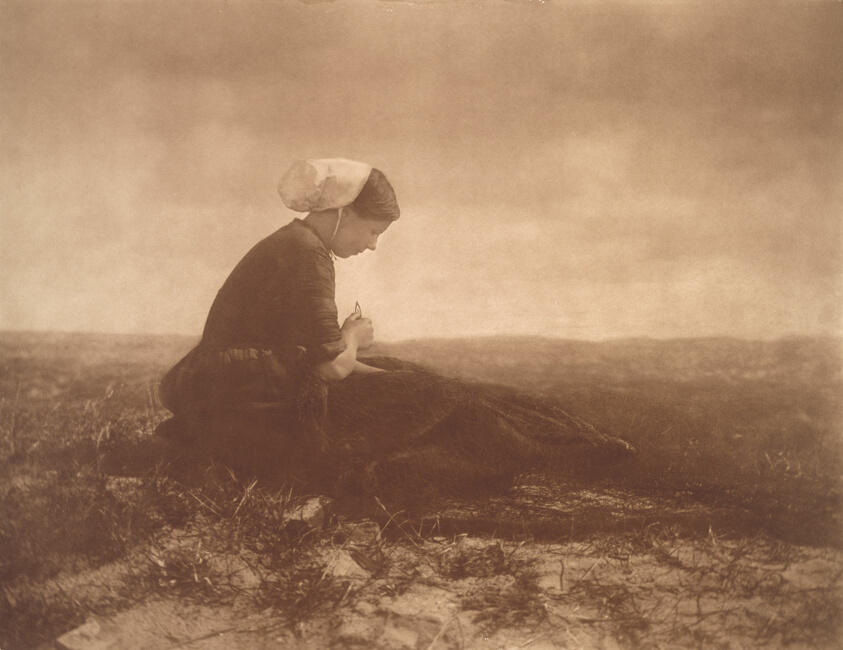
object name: Photograph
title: The Net Mender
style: Pictorialism, 19th century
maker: Alfred Stieglitz (American, 1864–1946)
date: 1894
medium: Carbon print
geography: United States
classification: carbon print; pigment process; photographic process; photography; photograph